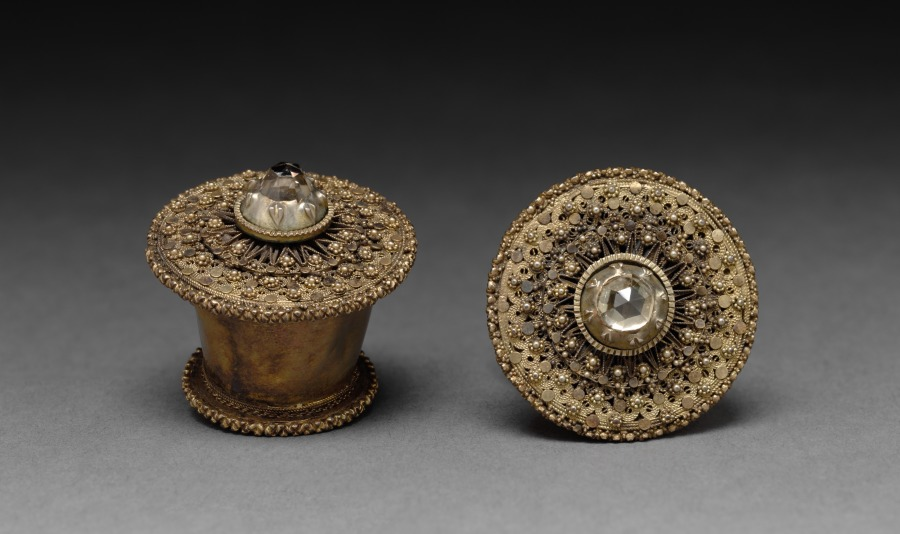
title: Pair of Earrings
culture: Burma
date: 1800s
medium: silver gilt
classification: Jewelry